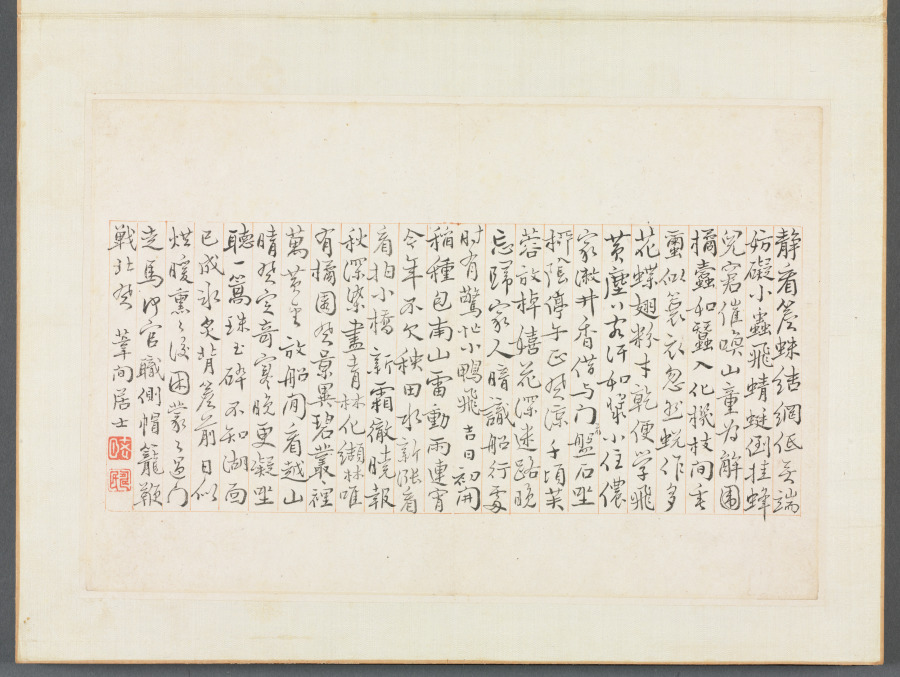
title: Album of Calligraphy and Paintings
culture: China, Qing dynasty (1644-1911)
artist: Bian Shoumin (Chinese, 1684–1752)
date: first half of the 1700s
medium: album leaf; ink and color on paper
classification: Painting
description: The artist Bian Shoumin is known for his depiction of wild geese, water, and reeds. The migrant birds in autumn and winter evoked, in the minds of the Chinese intelligentsia, a time of parting and sorrow.